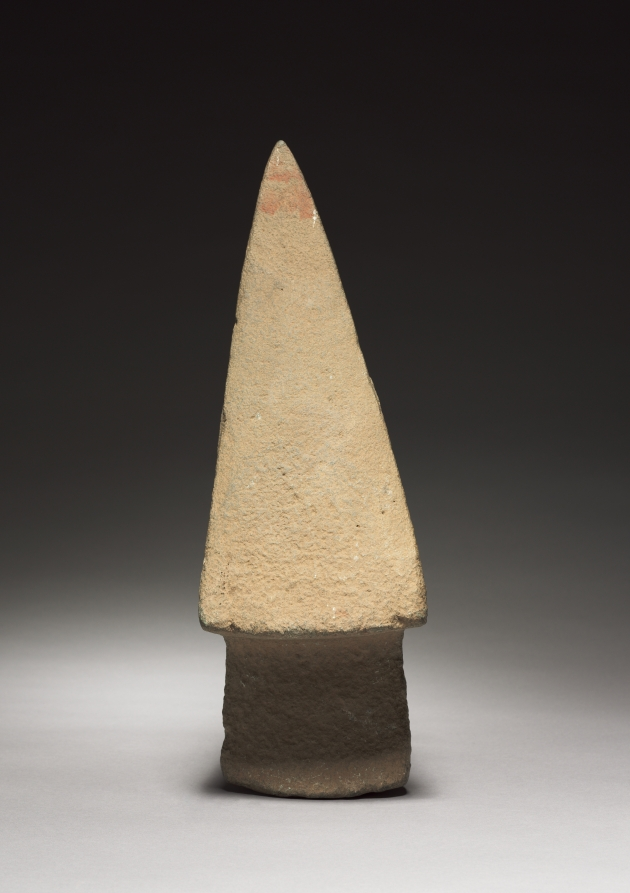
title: Hacha with Human Face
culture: Mexico, Veracruz, San Andres Tuxtla, late Classic period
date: 600–1000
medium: gray volcanic stone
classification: Sculpture